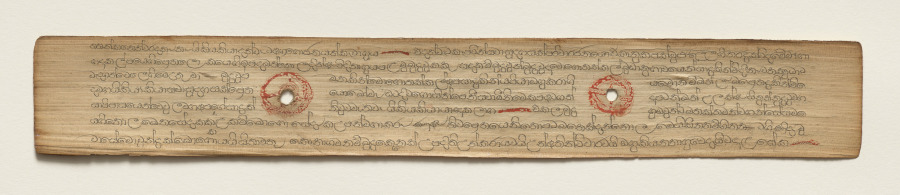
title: Leaf from a Buddhist Manuscript (verso)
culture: Sri Lanka, Singhalese, Late 17th century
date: c. 1700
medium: fiber paper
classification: Manuscript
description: Palm leaf material is still used for manuscripts in Sri Lanka. The palm leaves are prepared first by boiling them, drying them in the sun, and then rubbing them with oils. Scribes then use a metal stylus to incise the text. Then charcoal powder is wiped across the pages, filling in only the inscribed lines.